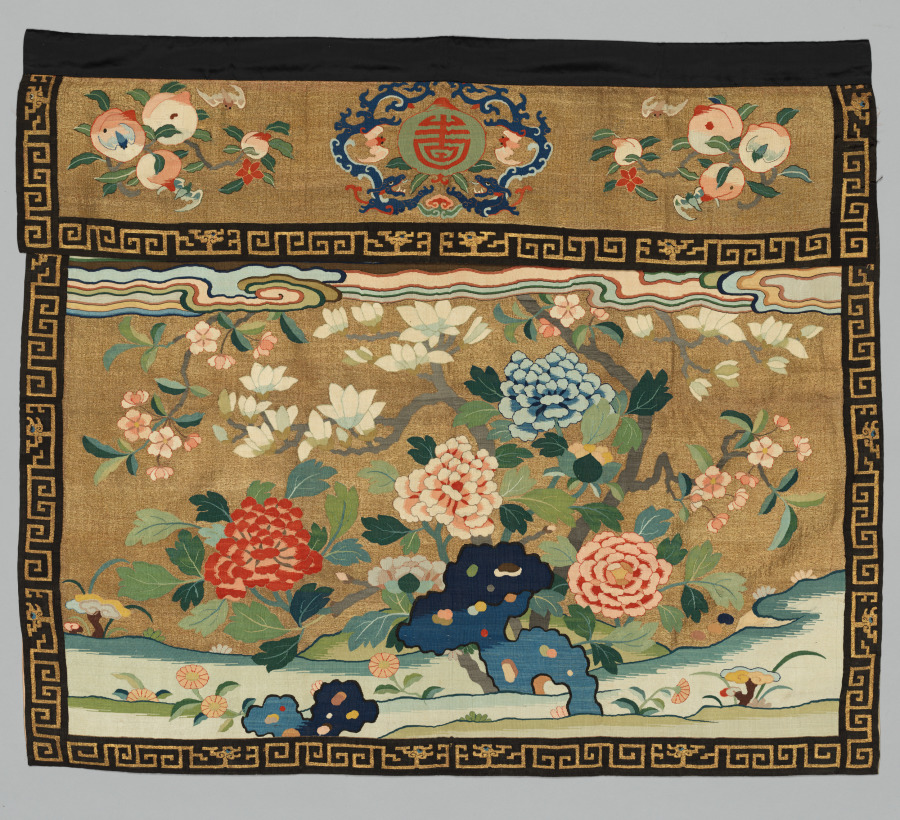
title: Table Hanging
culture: China, Qing dynasty (1644-1911)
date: 1700s–1800s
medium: Silk and gold filé; tapestry weave, slit joins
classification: Textile